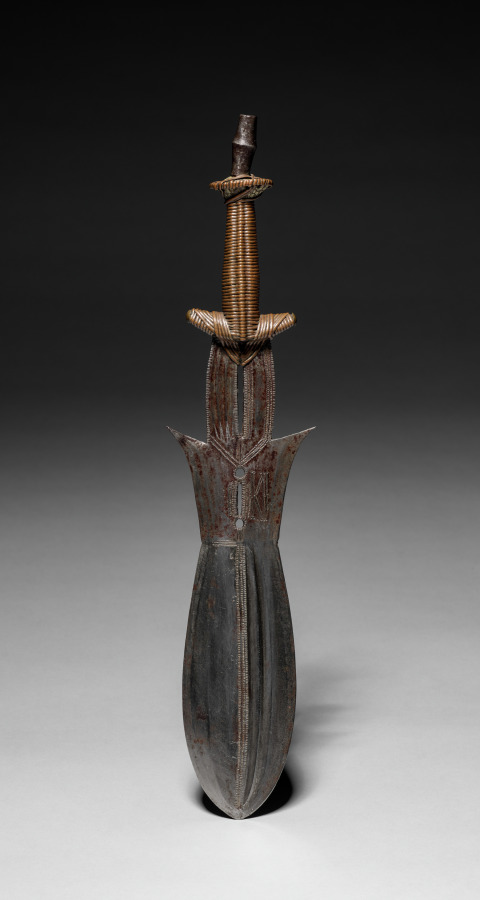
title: Knife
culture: Africa, Central Africa, Democratic Republic of the Congo, Ngbandi-style maker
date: c. 1900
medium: Iron and copper alloy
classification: Arms and Armor